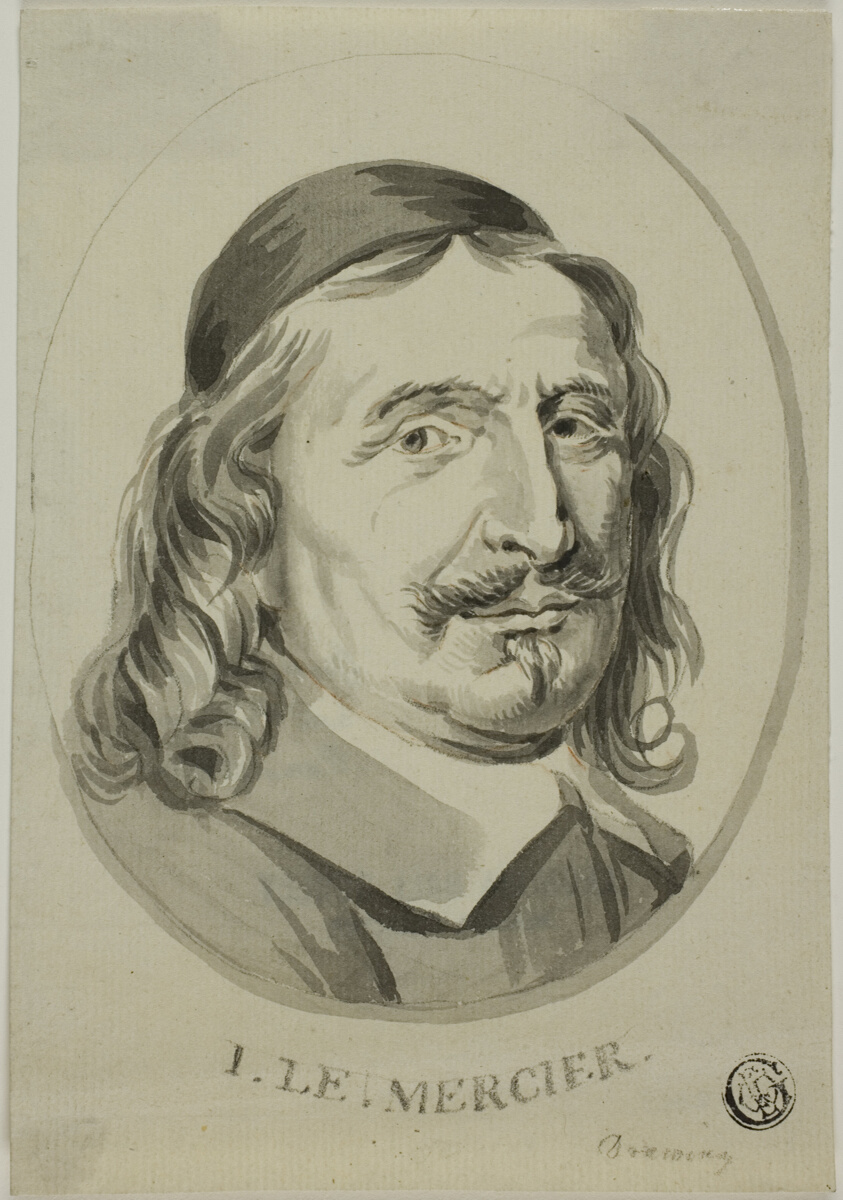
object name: Drawing and Watercolor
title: Jean Le Mercier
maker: Unknown Artist; French, 17th century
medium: Brush and black and gray wash, with touches of red chalk and graphite, on pale greenish-ivory laid paper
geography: France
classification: ink or chalk wash; drawings (visual works); prints and drawing